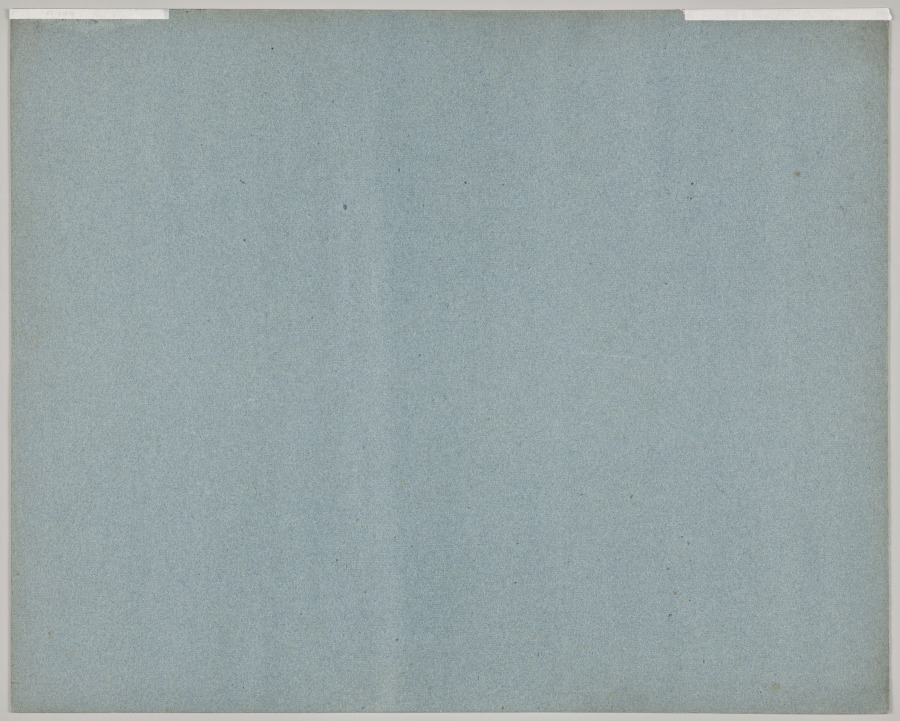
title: Capstone. John XX, 29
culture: Germany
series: Seven Areas from Salzburg and Berchtesgaden. Arranged according to the seven days of the week, connected by two allegorical sheets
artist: Ferdinand Olivier (German, 1785–1841)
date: 1818–23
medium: lithograph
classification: Print